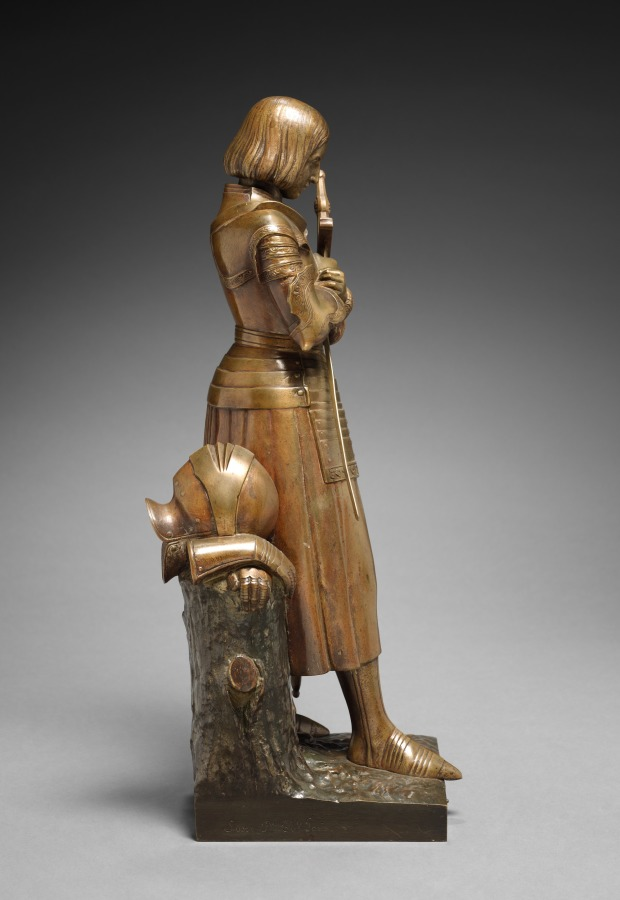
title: St. Joan of Arc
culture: France, 19th century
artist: Princesse Marie-Christine d' Orleans (French, 1813–1839)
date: 1836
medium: bronze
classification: Sculpture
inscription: Signed on top of base: "Marie d'Orléans."; inscribed on left side of base: "Susse Fres Edts Paris."